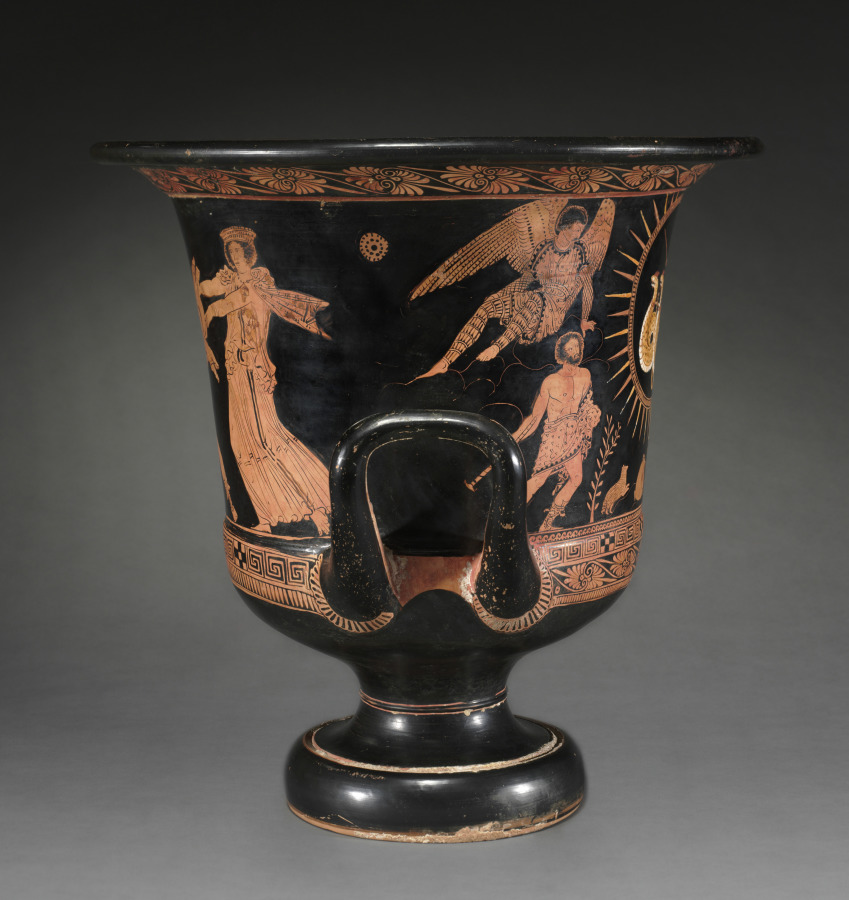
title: Red-Figure Calyx-Krater (Mixing Vessel): Medea in Chariot (A); Telephos with Baby Orestes (B)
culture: South Italian, Lucanian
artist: near the Policoro Painter (South Italian, Lucanian, active c. 400 BCE)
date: c. 400 BCE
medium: ceramic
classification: Ceramic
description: The remarkable scene on the front of this vase relates to the famous tragedy Medea, written by Euripides and first produced in Athens in 431 BC. Framed in the center by a halo (recalling her sun god grandfather Helios), the sorceress Medea flies off in a dragon-drawn chariot. Seeking revenge against her husband Jason, leader of the Argonauts, Medea has just slain their two children. Two Furies flank her, while Jason and a distraught nurse and teacher approach the bodies on the altar below. A different tragedy unfolds on the other side of the vase, from Euripides’s Telephos (438 BC). The wounded warrior Telephos holds the baby Orestes hostage at an altar, with Agamemnon and Clytemnestra rushing to save their son.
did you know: This vase includes scenes connected to two Athenian tragedies dealing with children—Medea and Telephos.